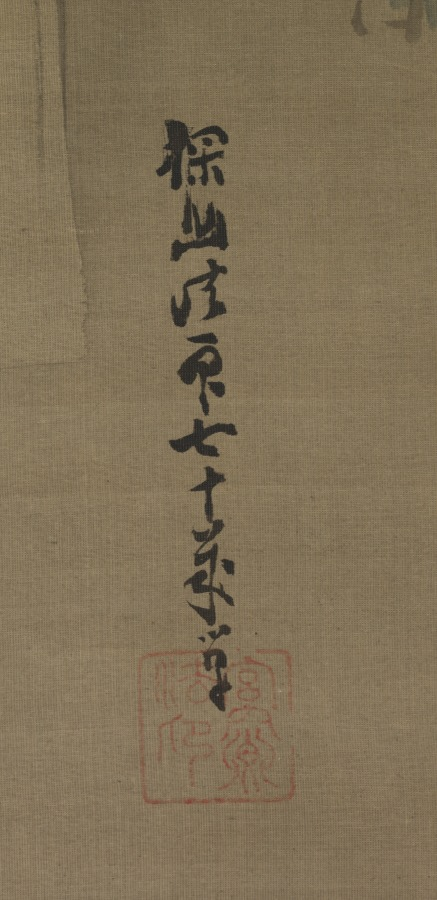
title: Chinese Sages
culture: Japan, Edo period (1615–1868)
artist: attributed to Kano Tan’yū (Japanese, 1602–1674)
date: mid- to late 1600s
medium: hanging scroll; ink and color on silk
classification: Painting